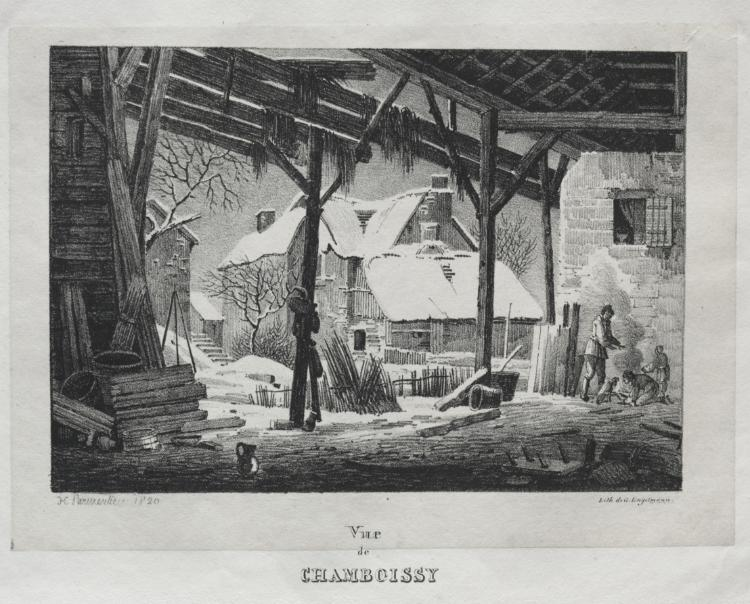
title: Vue de Chamboissy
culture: France, 19th century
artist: Godefroy Engelmann (French, 1788–1839)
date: 1820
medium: lithograph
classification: Print